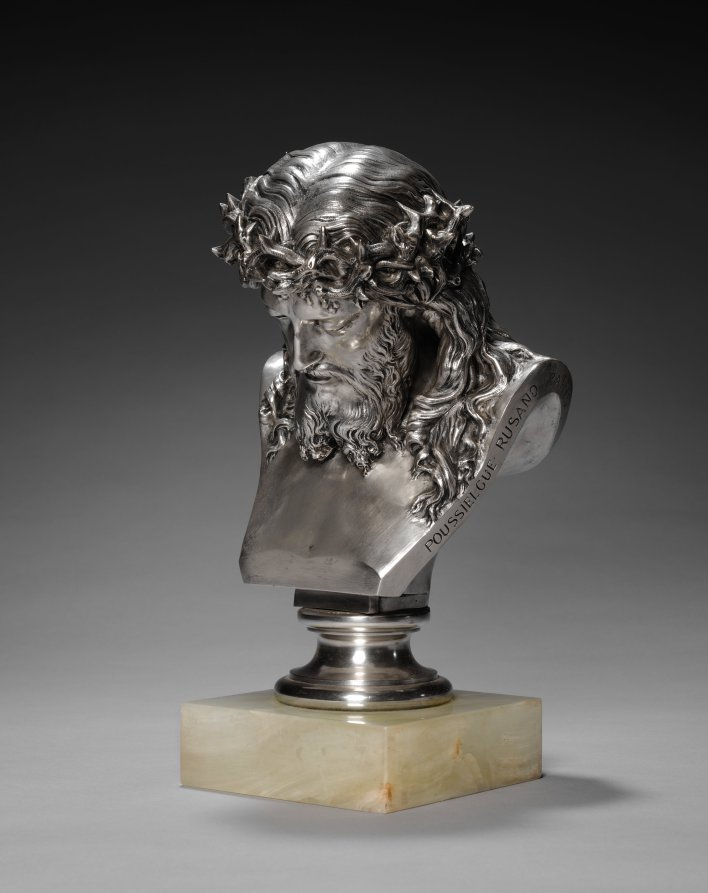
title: Head of Christ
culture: France, 19th century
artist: Jean-Baptiste Clésinger (French, 1814–1883)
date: 1867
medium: silvered bronze, marble base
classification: Sculpture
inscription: Signed in cut of right proper shoulder: "J. Clesinger, 1867"; inscribed in cut of left proper shoulder: "POUSSIELGUE RUSAND PARIS"; struck immediately above circular base: "17662"